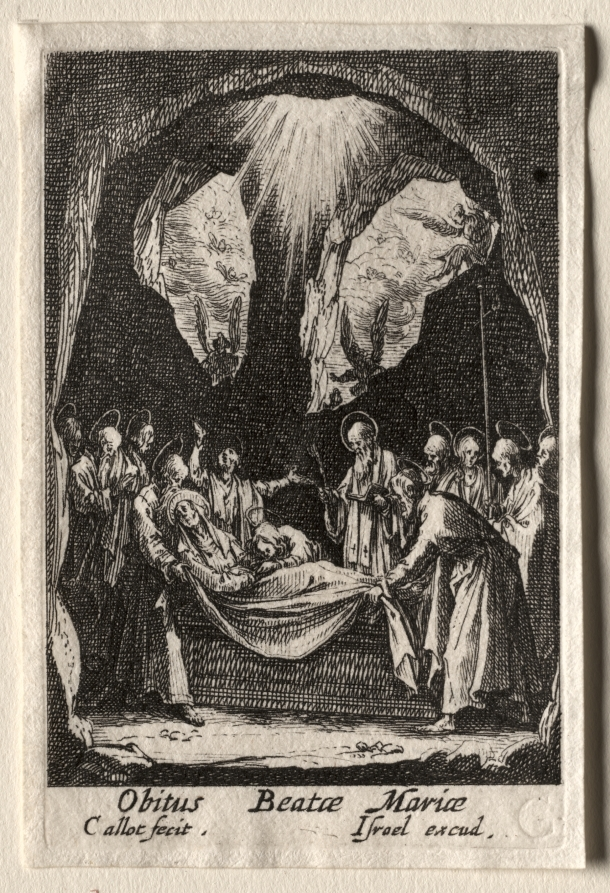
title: The Life of the Virgin: The Entombment of the Virgin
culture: France, 17th century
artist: Jacques Callot (French, 1592–1635)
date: ca. 1633–34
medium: etching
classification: Print